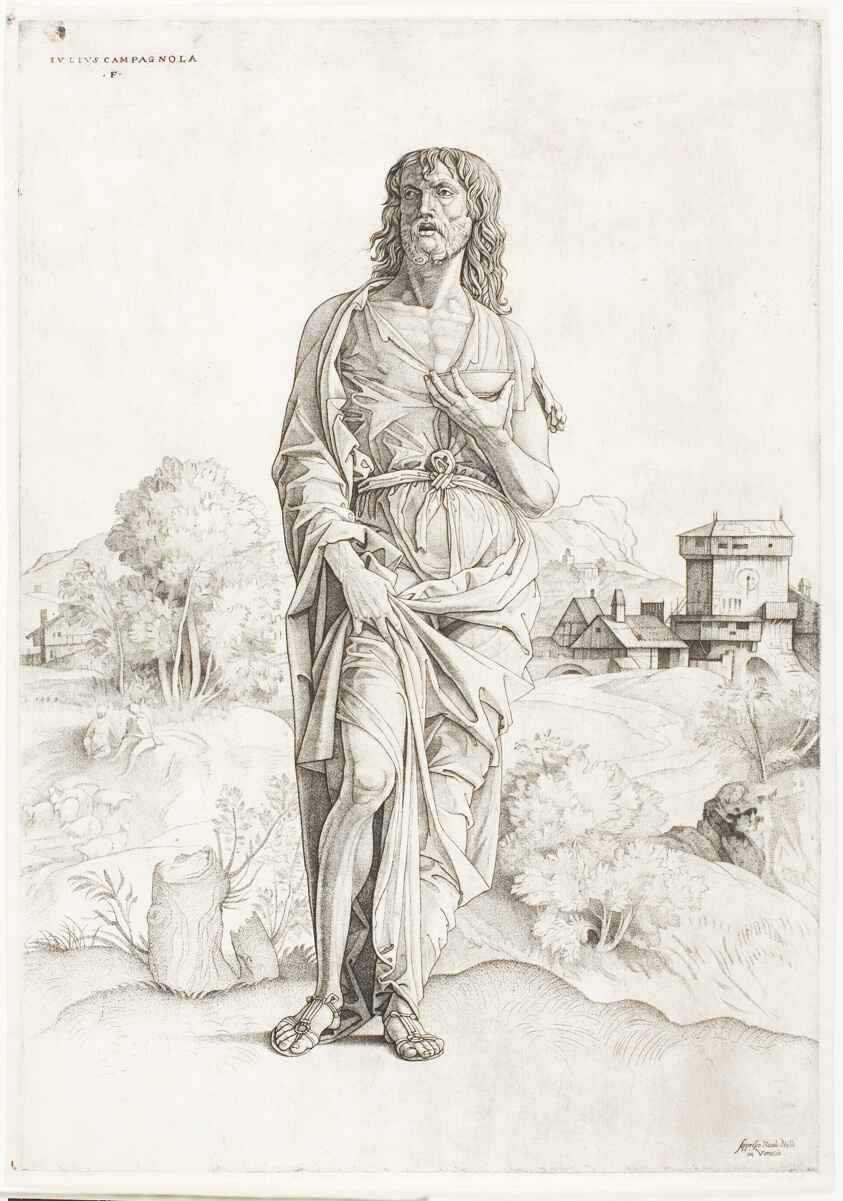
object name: Print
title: Saint John the Baptist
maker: Giulio Campagnola (Italian, c. 1482-1515/18)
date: c. 1505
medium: Engraving in black on ivory laid paper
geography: Italy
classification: engraving; print; prints and drawing